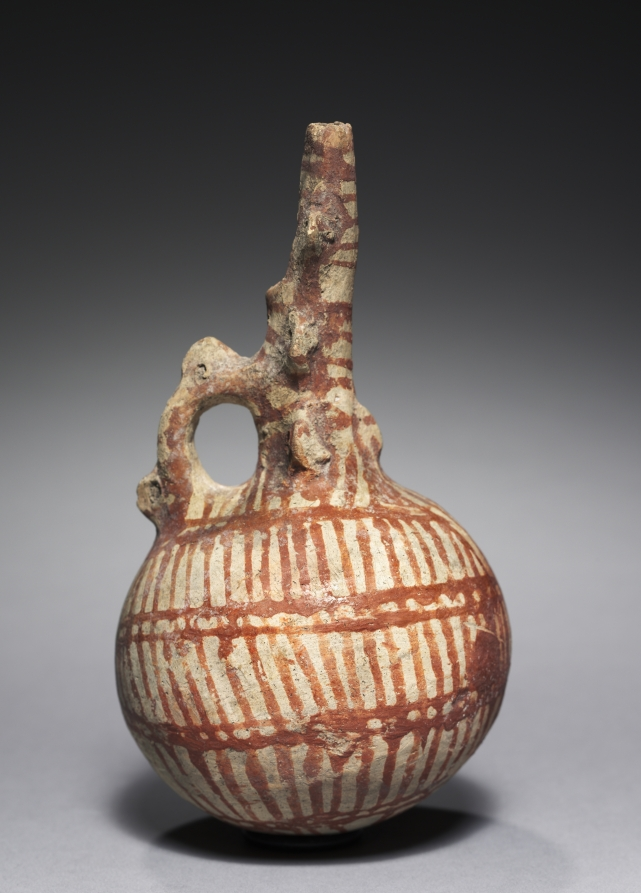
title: Jug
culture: Cyprus, middle Cypriot III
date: c. 1725–1600 BCE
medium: white painted ware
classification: Ceramic